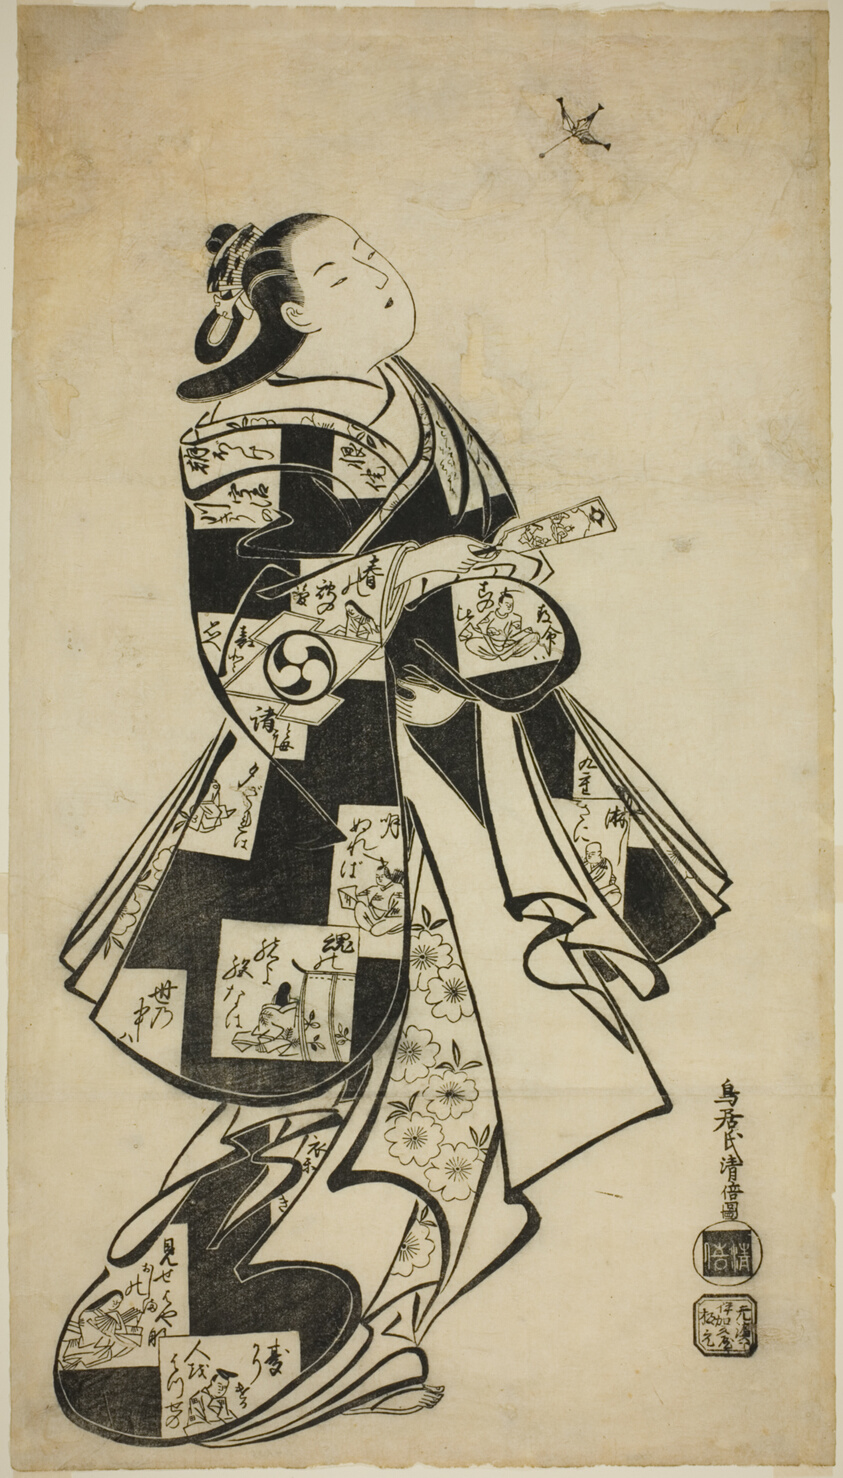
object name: Print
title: The Actor Nakamura Gentaro as a woman playing battledore and shuttlecock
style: Japanese (culture or style)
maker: Torii Kiyomasu I (Japanese, active c. 1704–18 (?))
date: c. 1704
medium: Woodblock print; o-oban, sumizuri-e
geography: Japan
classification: woodblock print; print; asian art; woodblock